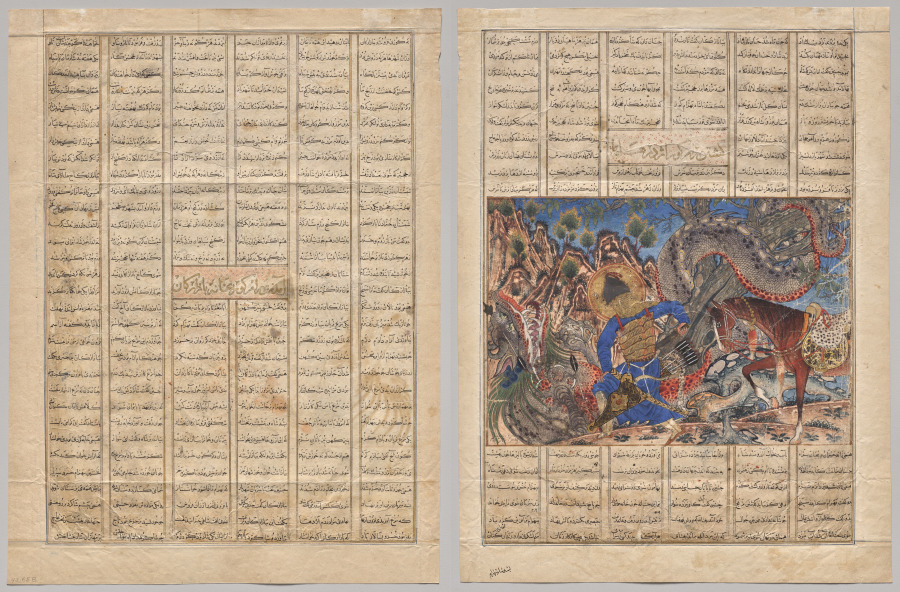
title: Bahram Gur Arrives at the House of a Merchant, text page (recto); Bahram Gur Slays a Dragon (verso), from a Shahnama (Book of Kings) of Firdausi (940–1019 or 1025), known as the Great Mongol Shahnama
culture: Iran, Tabriz, Ilkhanid period (1256-1353)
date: 1330–35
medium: opaque watercolor, ink, and gold on paper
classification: Manuscript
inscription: Script: Naskh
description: In this intense painting, Bahram Gur plunges his sword into the breast of a dragon. A favorite character from Iran's pre-Islamic history, Bahram Gur (reigned 420–38 CE) was a popular ruler of the Sasanian dynasty and a great hunter. He took the name "Gur," meaning onager (a wild ass), because it was his preferred game, although he also excelled at killing dragons. As evidenced by this illustration's rock formations, tree trunk, and dragon, Iranian painting in the Mongol period borrowed numerous stylistic and spatial elements from Chinese models. With the surging landscape and writhing dragon rendered with equal energy, this is a picture of extraordinary unity and concentration.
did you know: The Shahnama is an epic poem that traces the fortunes of heroes and kings, of lovers and enemies.